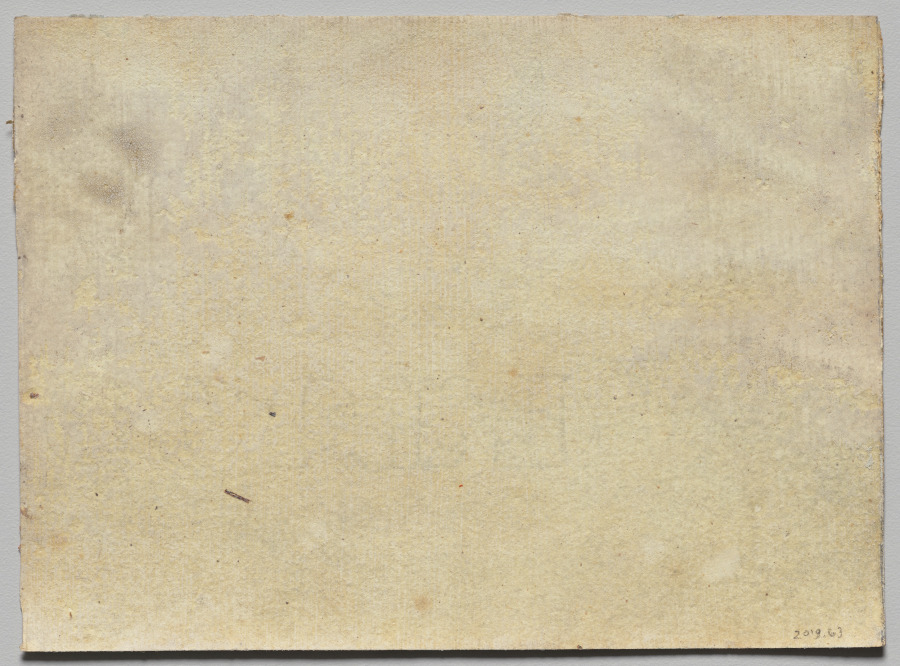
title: A Party Picnicking Near a Village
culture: France, 18th century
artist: Louis Nicolas van Blarenberghe (French, 1716–1794)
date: c. 1760–70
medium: gouache on antique laid paper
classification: Drawing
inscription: Watermark: partial letters, illegible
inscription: signed, lower right, black ink, “V Blarenberg”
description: Louis Nicolas van Blarenberghe was known for drawings such as this one, which were executed on a small scale with exacting detail. His designs attracted the attention of the French monarchy, and he received numerous royal commissions. This work shows well-dressed figures enjoying outdoor leisure in a rural village. Its panoramic landscape and dense crowd were both characteristic of Van Blarenberghe’s miniaturist style.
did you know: Louis Nicolas van Blarenberghe was from a family of painters; among them he was known as “the great Blarenberghe.”